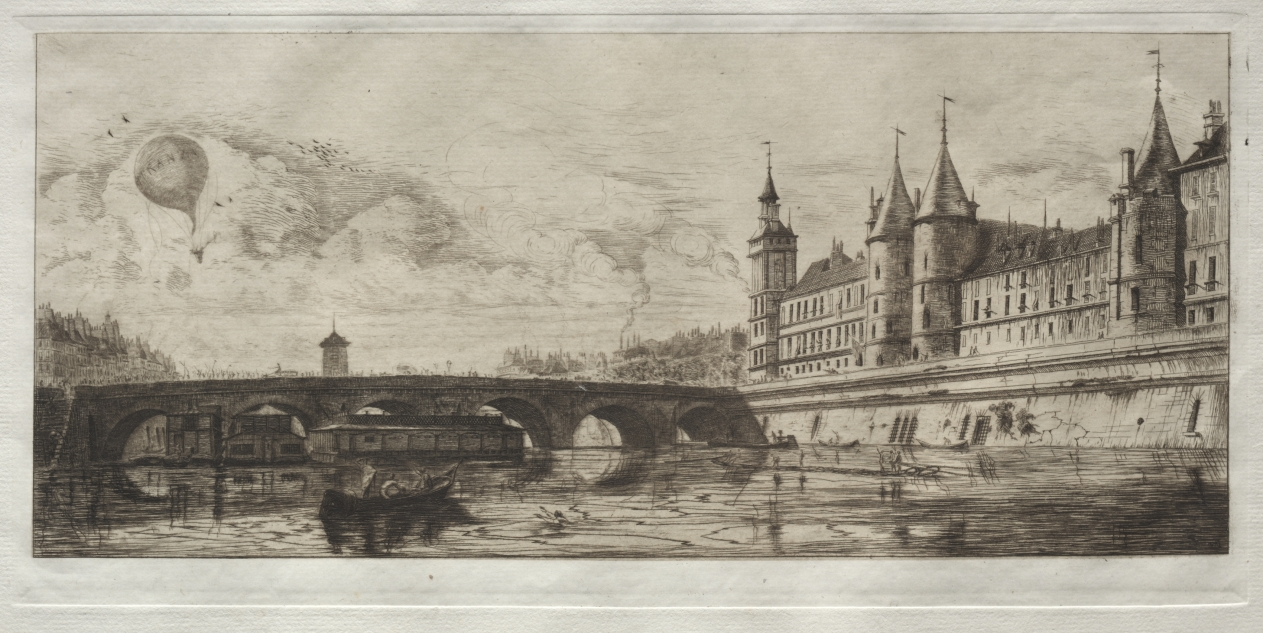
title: Le Pont-au-Change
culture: France, 19th century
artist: Edmond Gosselin (French)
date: c. 1881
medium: etching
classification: Print